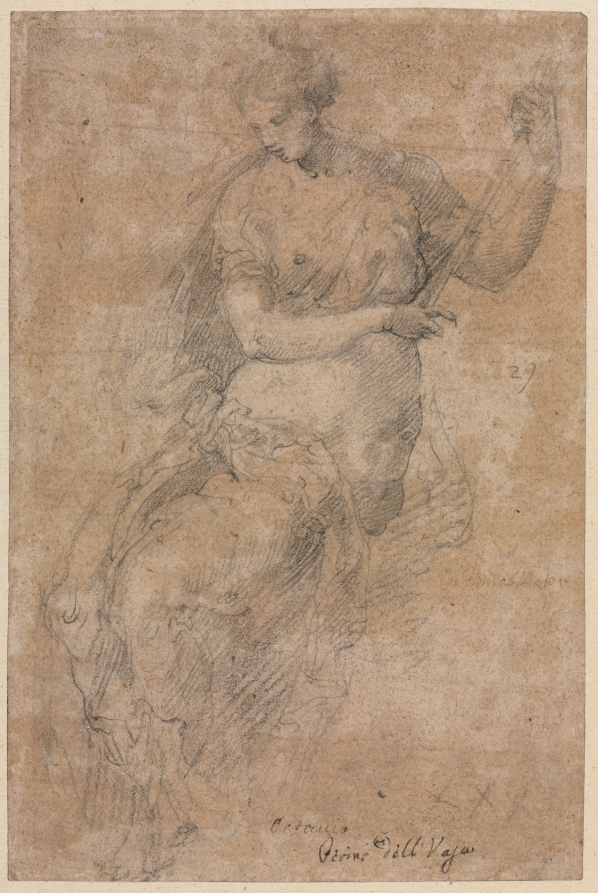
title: Allegorical Figure (recto)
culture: Italy, 16th century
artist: Niccolo dell' Abbate (Italian, c. 1512–1571)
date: 1500s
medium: black chalk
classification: Drawing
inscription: by artist?, lower right, in black chalk: XXX ; center right, in brown ink: 29 ; center right, in brown ink: [O.?] Fama M[a?]jo[r?] 101. ; lower center, in brown ink: Octavio ; lower center, in brown ink: Perino dell' Vaga